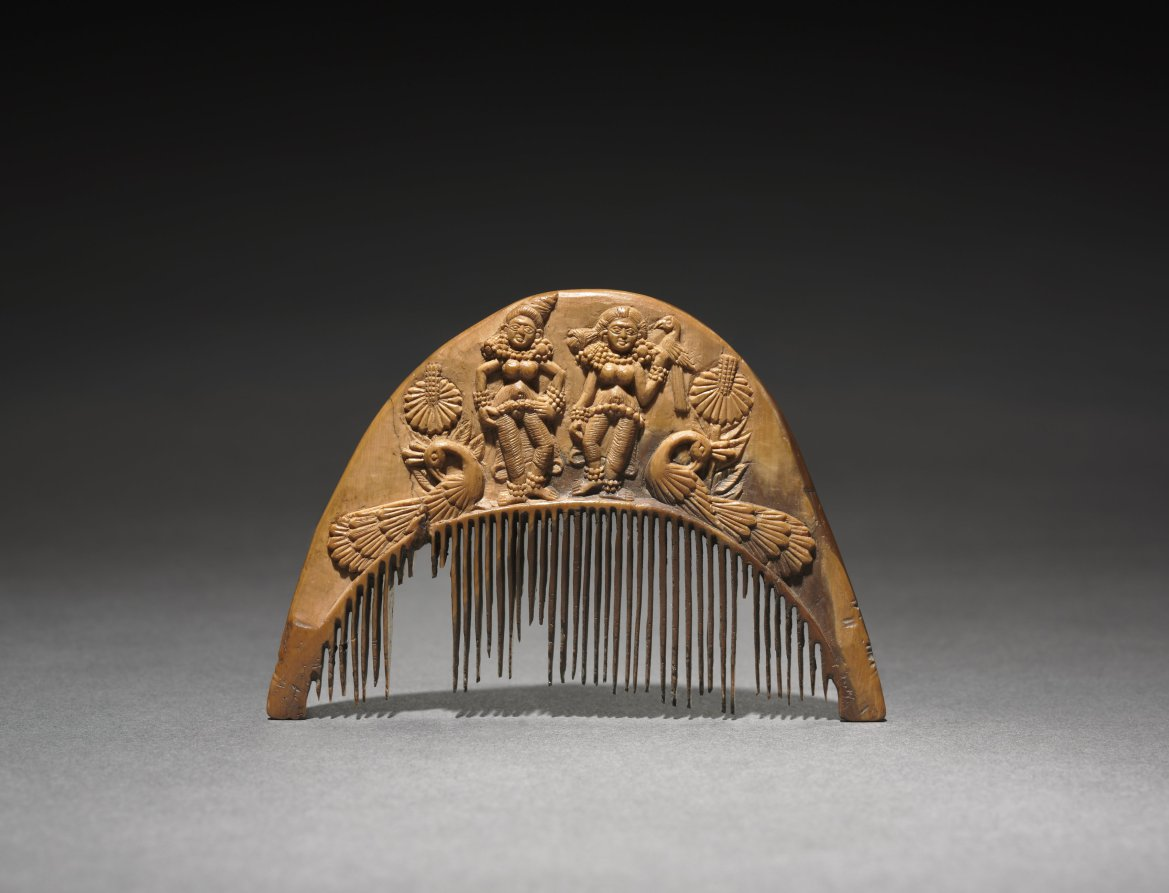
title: Comb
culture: India, Bengal, Chandraketugarh area, Shunga period (185–78 BCE)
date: 200 BCE–100 CE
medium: ivory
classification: Ivory